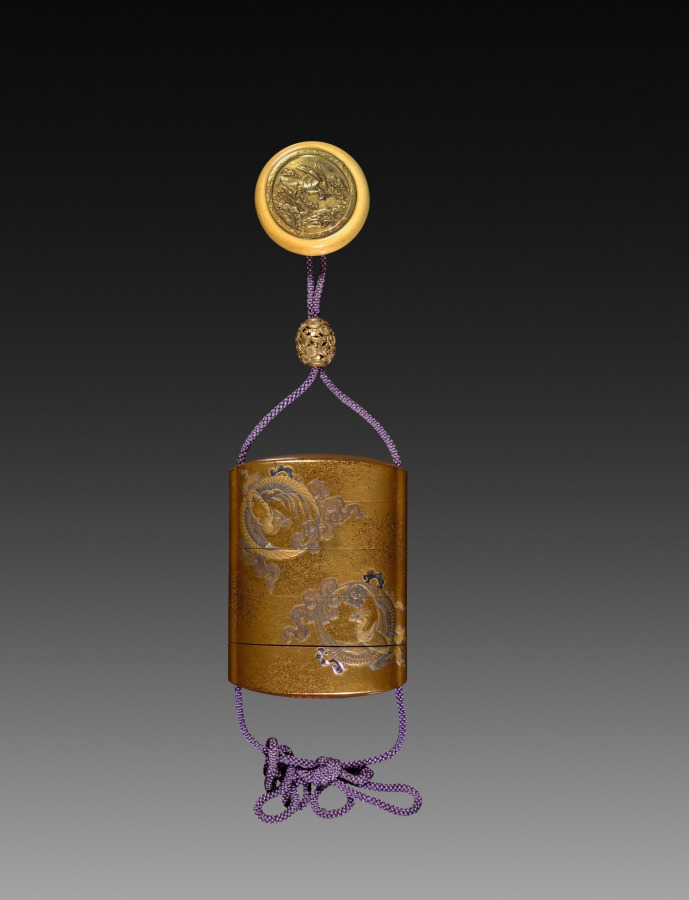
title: Inro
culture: Japan, Edo period (1615–1868)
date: 1750–99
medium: lacquer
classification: Lacquer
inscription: Signature: Kajikava